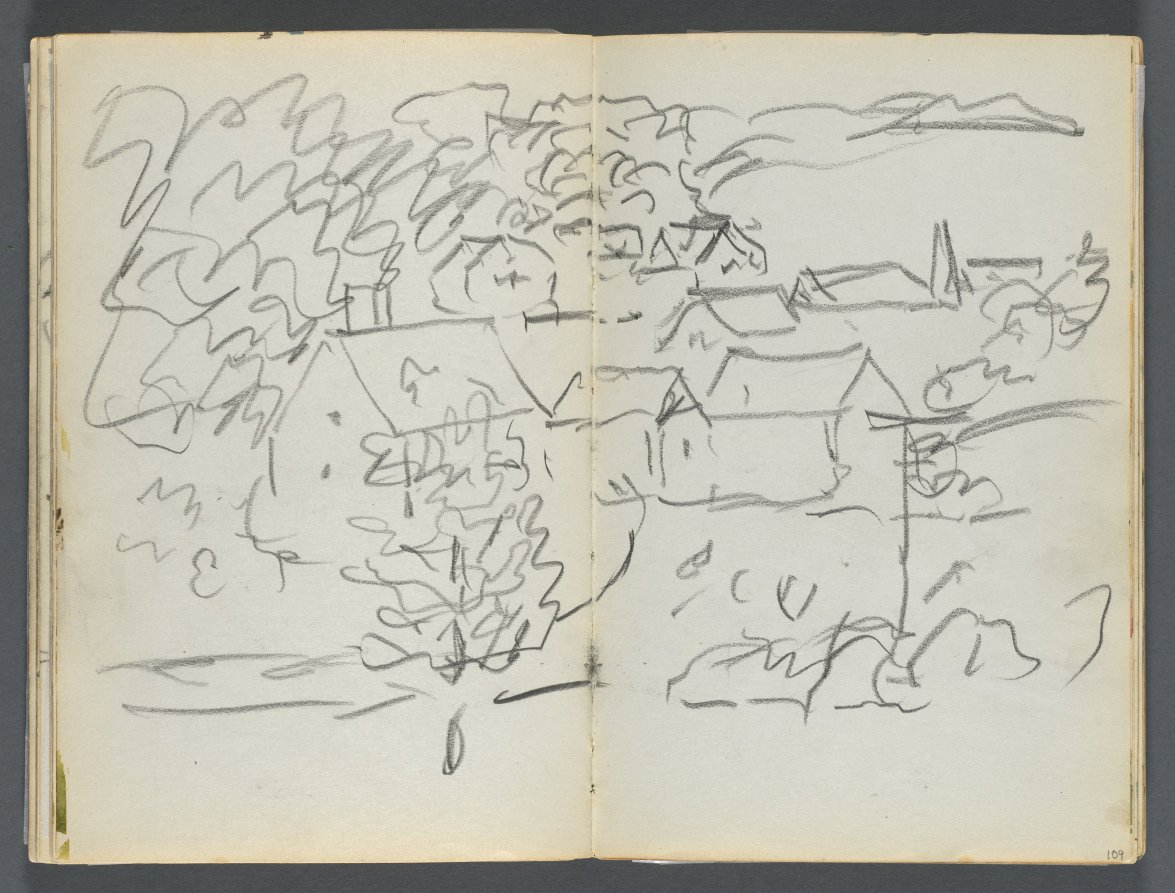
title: Sketchbook, The Dells, N° 127, page 108 & 109: Landscape with Houses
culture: America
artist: Maurice Prendergast (American, born Newfoundland [now Canada], 1858–1924)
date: c. 1919–1921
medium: graphite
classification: Bound Volume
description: This sketchbook contains 59 pages of graphite drawings and 16 watercolors made at various locations on Cape Ann, Massachusetts.